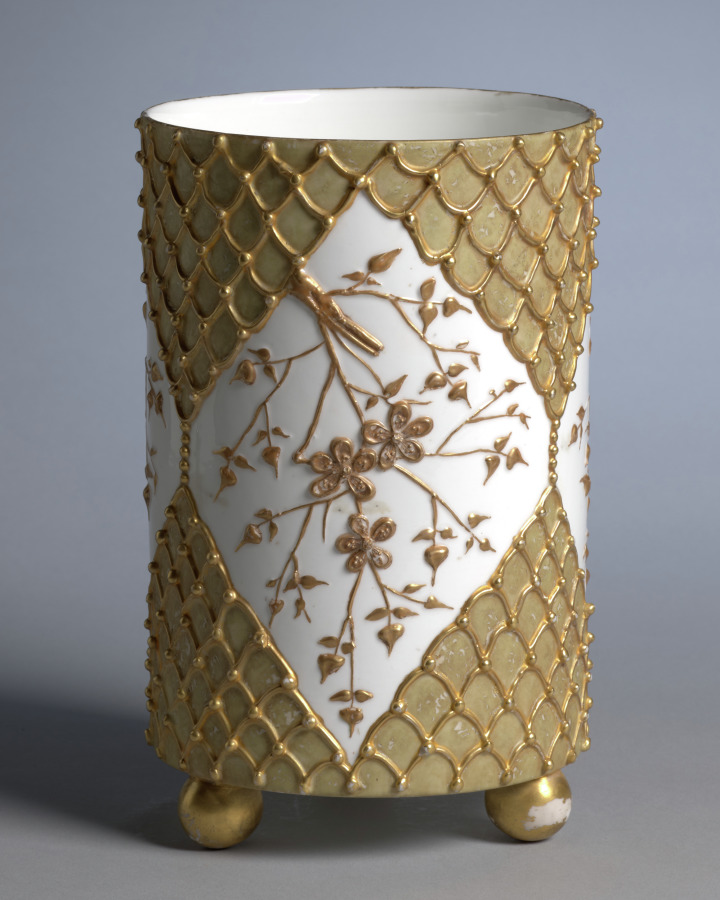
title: Vase (Lotus Ware)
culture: America, Ohio, East Liverpool, 19th century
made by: Knowles, Taylor and Knowles Company (American)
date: c. 1895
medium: porcelain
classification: Ceramic